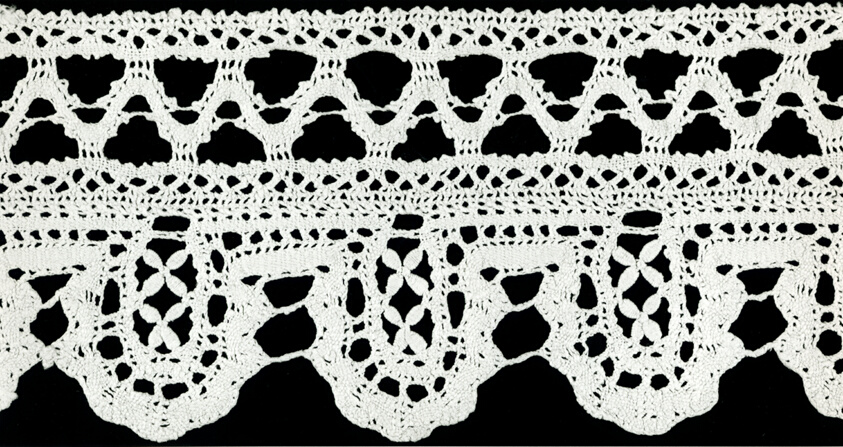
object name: Textile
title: Border (Furnishing)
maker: Italy, probably Genoa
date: 1601/50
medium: Linen, bobbin straight lace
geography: Italy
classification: textile; lace - bobbin